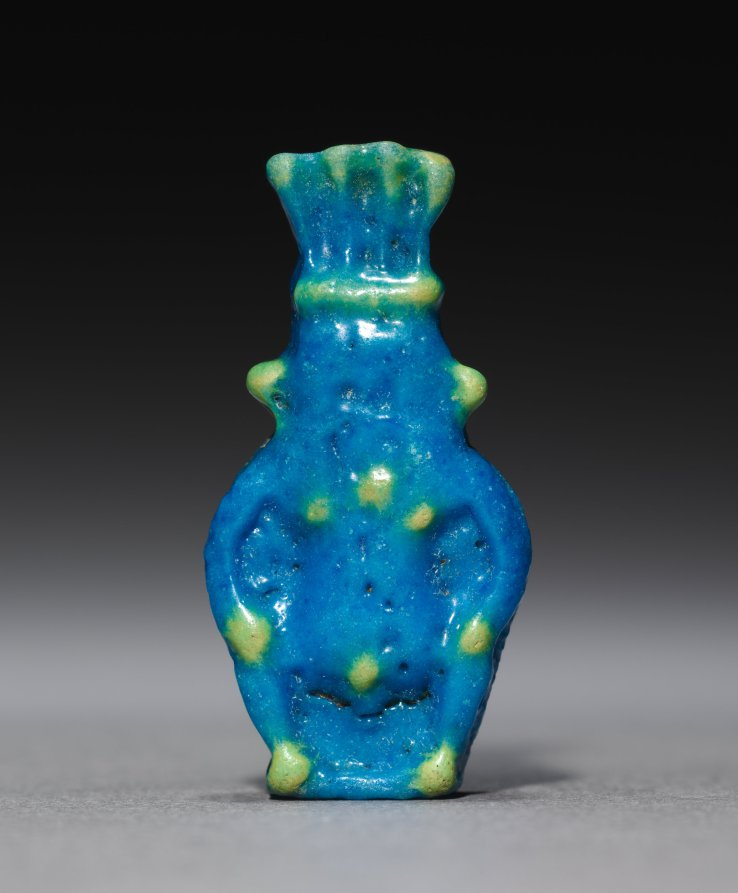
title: Amulet of Bes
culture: Egypt, Greco-Roman period (332 BCE–395 CE), Roman empire (30 BCE–395 CE)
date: 30 BCE–395 CE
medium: polychrome faience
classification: Amulets